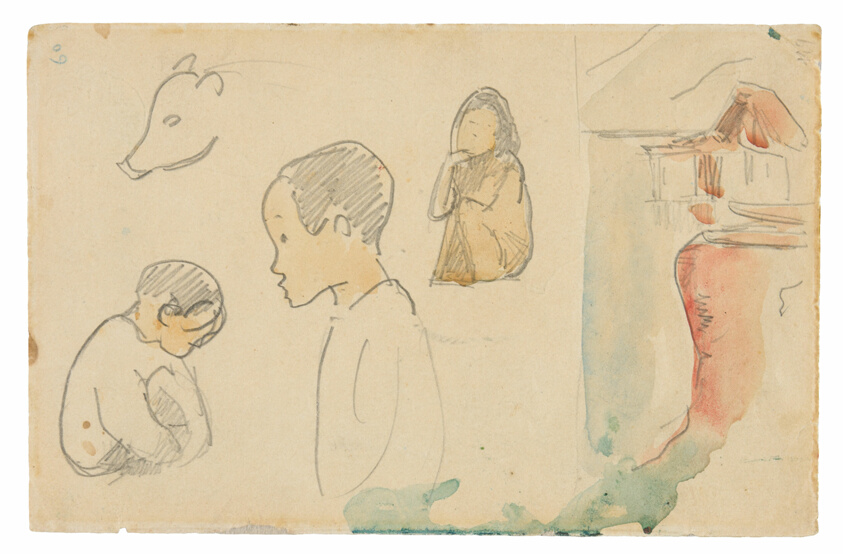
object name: Drawing and Watercolor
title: Sketches of Crouching and Standing Figures, a Pig, and a Hut at Water’s Edge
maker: Paul Gauguin (French, 1848-1903)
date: 1891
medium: Graphite and watercolor on cream wove paper, discolored to tan (removed from a sketchbook)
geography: France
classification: graphite; watercolor; drawings (visual works); prints and drawing